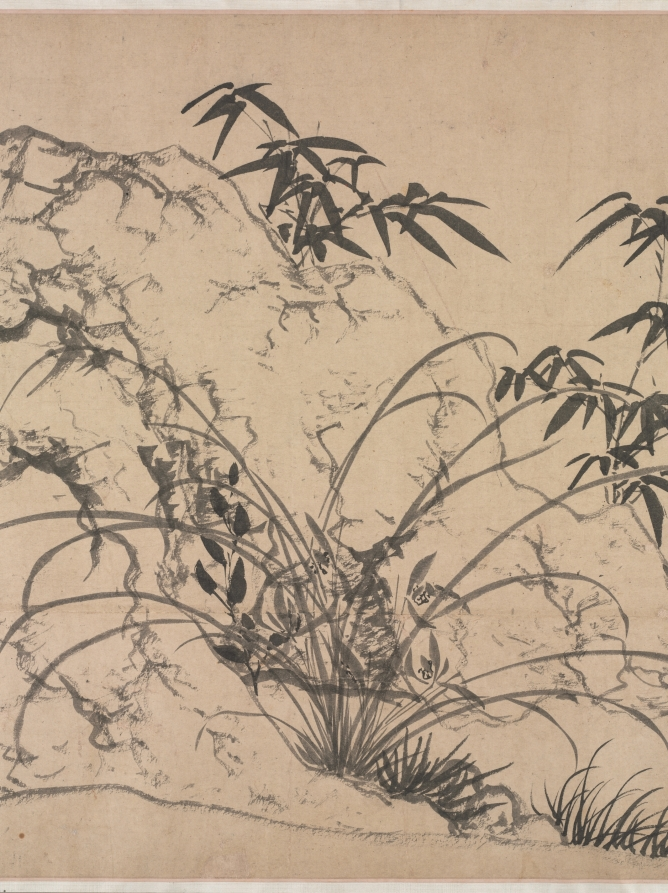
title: Bamboo, Rocks and Lonely Orchids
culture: China, Yuan dynasty (1271-1368)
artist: Zhao Mengfu (Chinese, 1254–1322)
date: 1271–1368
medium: Handscroll; ink on paper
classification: Painting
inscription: 竹石幽蘭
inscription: 孟頫為善夫寫. [印] 趙氏子昂; [印] 松雪齋; [印] 天水郡圖書印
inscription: 古人善書者必能畫點墨作蠅，便自有生意。松雪翁蘭石草聖飛帛筆法皆具，可寶也。安陽韓性 [印]明善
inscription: Colophon 2. Qiu Yuan 仇遠 (1247-after 1328), a respected poet during the Song and Yuan periods. He was linked to, among others, Zhao Mengfu and Gao Kegong. Zhao Mengfu painted a version of Nine Songs 九歌圖 for him, and Gao Kegong dedicated to him a painting titled Mountain Village 山村圖 (current whereabouts unknown). His poem here is also preserved in his collected works.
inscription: Colophon 3. Zheng Yuanyou 鄭元祐 (1292-1364), an erudite scholar and teacher of renown, active in Hangzhou and Suzhou. In the 1350s, when Gu Ying’s literary gatherings were at their peak, he was already elderly and participated in a limited way.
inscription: Colophon 4. Wu Kegong 吳克恭 (active mid-1300s), a friend of Gu Ying and Ni Zan 倪瓚 (1301–1374), a major Yuan painter.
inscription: Colophon 5. Angji 昻吉 (jinshi of 1348), of Western Xia 西夏 origin and a poet of distinction. He wrote an introduction to the painting Literary Gathering at Yushan 玉山雅集圖, of which Zhang Wo was the painter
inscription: Sheet 2. Yuan: friends of Gu Ying Colophon 6. Wang Zifang 王孜方 (active mid-1300s), an official who, at the time of his visits to Gu Ying’s estate, had reached the rank of Minister. He is better known under the name Wang Keju 王可矩.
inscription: Colophon 7. Ke Jiusi 柯九思 (1290–1343), a major official who served in the Kuizhang Pavilion 奎章閣 and as an advisor to Emperor Wenzong in matters of calligraphy and painting.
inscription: Colophon 8. Yu Li 于立 (active mid-1300s), a Daoist recluse, poet, and close friend of Gu Ying, so much so that during his visit to Gu Ying’s estate he was given accommodation in a special pavilion. His poem here is also preserved in Gu Ying’s Cao tang ya ji.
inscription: 至正十一年十月廿八日男奕百拜堇觀 [印] 趙奕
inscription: Colophon 10. Yu Ji 虞集 (1272-1398), a major official and literary figure who also served in the Kuizhang Ge. His poem is recorded in his collected works. The poem is one of a set of four inscribed at the request of Wang Huayu 汪華玉 on Orchids and Rock 蘭石圖 by Zhao Mengfu, obviously a different, long lost, painting. Wang Huayu was an official and a collector (jinshi of 1327). Yu Ji’s colophon here was written before 1348 and during his retirement in Linchuan 臨川, Jiangxi, possibly sent from there. It is possible he had not seen the painting, and his calligraphy here appears to be rather casual and detached, jotting down an old poem without much care, contrary to his earlier practice.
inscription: Colophon 11. Sun Shi 孫時 (mid-1300s–early 1400s), a native of Yuncheng 鄆城, Shandong, and a jinshi of 1390. He may have been quite young when paying a visit to the Yushan gatherings in the late 1340s and early 1350s.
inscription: Colophon 12. Zhang Zhu 張翥 (1287–1368), Qiu Yuan’s disciple and a poet of renown, who enjoyed a belated career in officialdom and was known for his integrity.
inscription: Sheet 4. Yuan and Ming: further friends of Gu Ying; colophon 17 begins the early Ming sequence. Colophon 13. Zhang Wo 張渥 (active c. 1336-after 1364), a frustrated scholar, a poet, and a painter of landscape and figures. An active participant in Gu Ying’s literary circle, he painted the Literary Gathering at Yushan, a pictorial document of the individuals and activities on Gu Ying’s estate. His rendering of Nine Songs is well known, and one version is in the collection of the Cleveland Museum of Art (see 1959.138). His poem here is also found in Gu Ying’s Cao tang ya ji, under the entry “ti Zhao Hanlin mo lan 題趙翰林墨蘭” (inscribed on the Ink Orchid by Zhao the Hanlin academician). This is a rare instance of calligraphy as well as signature by the artist.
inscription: 觀吳興公竹石幽蘭圖使人鄙吝頓消。其筆勢從橫天真爛澷，一出於二王書法。冝仲瑛寳而玩之異於常品也。至正八年十月天台陳基書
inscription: Colophon 15. Zhang Shen 張紳 (active about 1340–after 1385), a respected calligrapher and participant in Gu Ying’s literary gathering. He resided in Kunshan, the same city where Gu Ying’s estate lies. In the third line of the poem, he mentioned Gu Ying’s hao, “Jinsu 金粟.” This was a name he assumed later in life, after the death of his mother in the year 1356. Thus this inscription must have been written after that date.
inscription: Colophon 16. Wang Sun 汪遜 (active mid-14th century), a little-known native of Kuaiji 會稽, who may have been one of the infrequent visitors to Gu Ying’s estate.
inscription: Colophon 17. Hu Guang 胡廣 (1370-1418) is the first Ming colophon writer on this scroll. He was an official of great power in the court and a trusted advisor of Emperor Chengzu; he served as the Grand Academician of the Hall of Literary Profundity 文淵閣大學士 and Grand Academician of the Left Secretariat of the Heir-Apparent 左春坊大學士.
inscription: Sheet 5. Early Ming Colophon 18. Wang Yinshi 王尹實 (active about 1403–about 1424), a native of Siming 四明, Zhejiang, and a minor official and calligrapher.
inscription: Colophon 19. Zhang Yuchu (signed here as “Wuwei 無 為”), the forty-third Heavenly Master of the Zhengyi sect of Daoism. A man of erudition, he was also a poet, painter, and calligrapher. A modified version of the poem here was published in his collected works titled Xian quan ji 峴泉集. A slight modification in the first line is the only change: “Wu xing miao yao nian bing xue zi 吳興玅年氷雪姿.”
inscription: Colophon 20. Yao Guangxiao 姚廣孝 (1335-1418), a Buddhist monk, scholar, and counselor to Chengzu in his successful attempt at usurpation of the throne. Yao Guangxiao was a controversial figure but wielded enormous power.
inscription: Sheet 6. Wang Ning alone Colophon 21. Wang Ning 王寧 (d. 1411) signed as “Qingzhen 清真” in this colophon. One of the three seals reveals his identity as the Yongchun Hou 永春侯 [Marquis of Lasting Spring] (appointed 1402), and the husband of Princess Huaiqing 懷慶公主 (1328-1398), the sixth daughter of the founder of the Ming dynasty, Zhu Yuanzhang. This colophon postdates 1402.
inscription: Sheet 7. Mid-Ming Colophon 22. Ou Yi’an 區易安 (active first half of 15th century), unknown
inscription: Colophon 23. Chen Lian 陳璉 (1370-1454), a native of Dongguan 東莞, Guangdong 廣東, and an official admired for his erudition and perspicacity. In view to the known calligraphic style of Chen Lian, this colophon appears to be a transcription and not written by him.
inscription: Colophon 24. Wei Ji 魏驥 (1374-1471) enjoyed longevity (he lived to the age of ninety-eight) and an extended length of service as an official. A jinshi of 1406, he eventually became the Minister of Personnel in Nanjing 南京吏部尚書. The colophon here is dated 1434, when he was invited to view the painting by the Court Musician Mo Zhizhong 莫至翀, its owner. Again, in view of its calligraphic style, this was not written by him, but is a transcription from the original.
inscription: Colophon 25: Zhang Yi 章鎰 (active 1462-1473), a Ningbo native and an official with a reputation for courage and integrity.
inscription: Sheet 8. Further mid-Ming Colophon 26. Yin Zhi 尹直 (1427-1511), a controversial figure in Ming politics in spite of his erudition and high position as the Minister of War 兵部尚書.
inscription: Colophon 27. Zou Yu 鄒虞 (active 1460-1520; jinshi of 1490), a native of Hangzhou. In 1510, he was appointed Administrative Vice Commissioner in Guangdong.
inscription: Sheet 9. Xu Shouhe 徐守和 alone Colophon 28. Xu Shouhe 徐守和 dated his entry in 1629. Since he wrote it in his own studio, The Lesser Qingbi Pavilion 小清閟, he was likely the owner of the scroll. Xu’s life is not well documented; he was a connoisseur of note during the last years of the Ming dynasty rule. He may have acquired the Cleveland scroll from Wu Ting, whose seals appear here.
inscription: Sheet 10. The mounter’s note. Xu Shudong 徐曙東 of Jiaxing 嘉興 made the remounting on the first day of sixth month, 1802.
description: Bamboo and orchids are motifs associated with the virtues of the scholar-official. Bamboo that bends but does not break stands for moral integrity, endurance, and loyalty. Wild, fragrant orchids that bloom in the shadow symbolize modesty and the aura of learnedness. Rocks are often considered to be miniature versions of mountains that form the universe. This monochrome ink painting is brushed on paper in a masterfully calligraphic manner. While the rocks are delineated in chalky, dry strokes showing the effect of flying white (feibai), the bamboo and orchids are drawn with a swift brush demonstrating the virtuosity of the artist.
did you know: One of the many inscriptions records that the handscroll was last remounted by Xu Shudong 徐曙東 of Jiaxing 嘉興 in 1802.